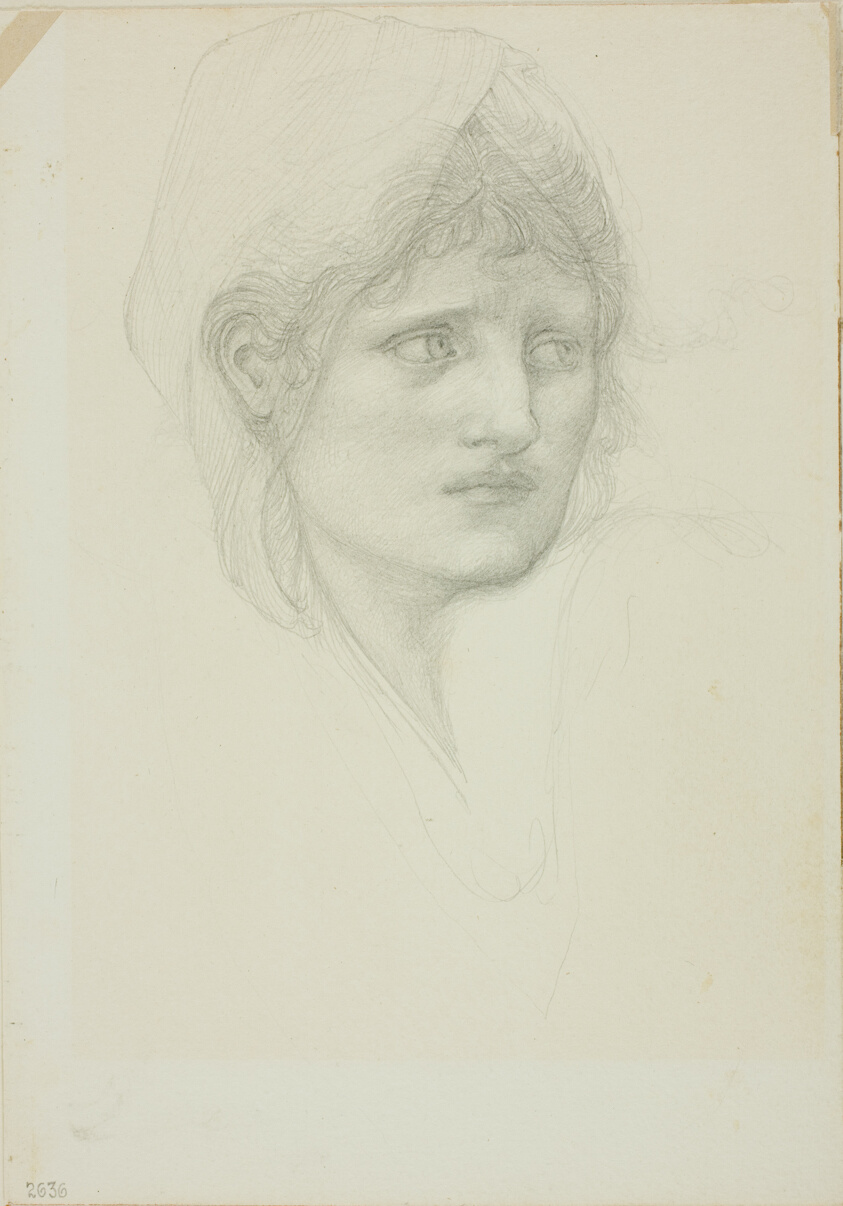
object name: Drawing and Watercolor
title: Draped Head, Eyes Looking Toward Right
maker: Sir Edward Burne-Jones (English, 1833-1898)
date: c. 1873–77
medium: Graphite on ivory wove paper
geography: England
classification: graphite; drawings (visual works); prints and drawing